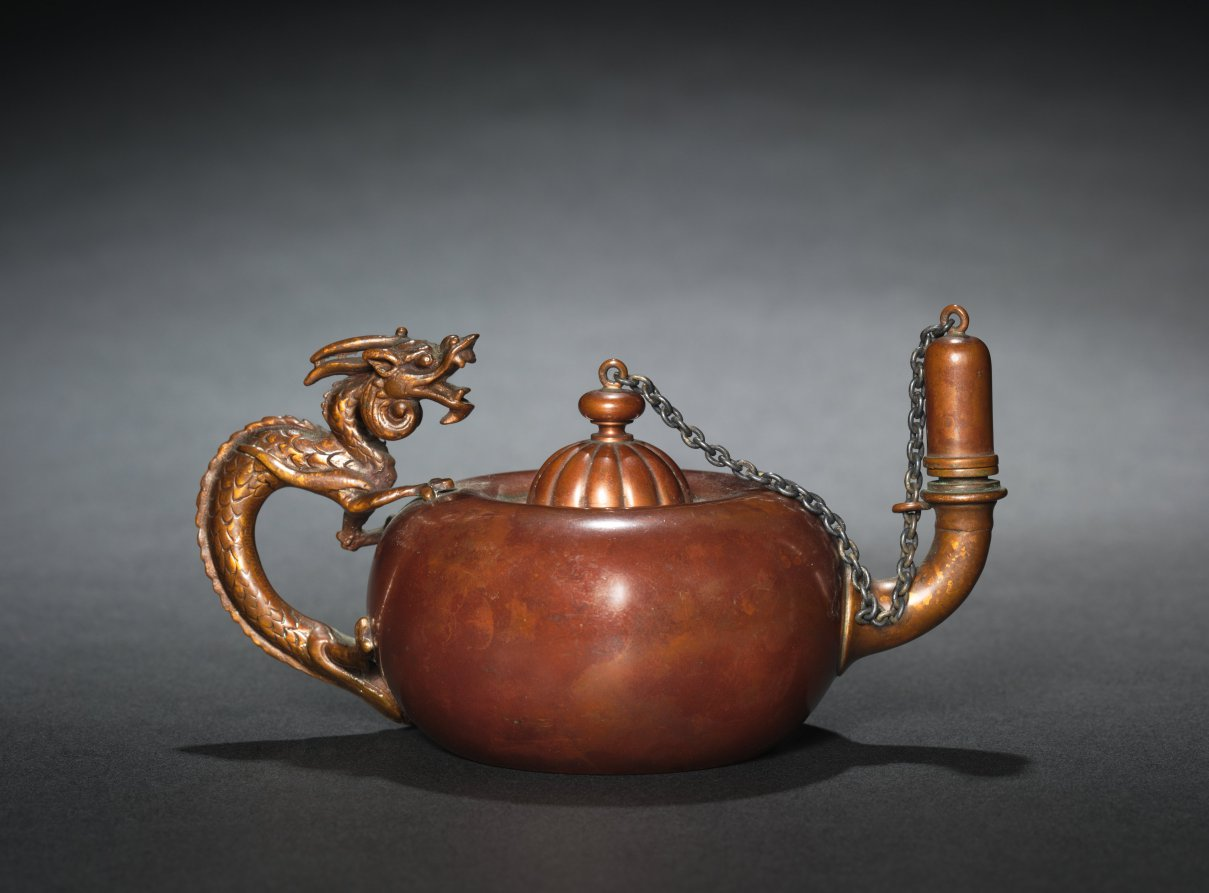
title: Oil Lamp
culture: America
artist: Gorham Manufacturing Company (America, est. 1831)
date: 1880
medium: copper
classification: Metalwork